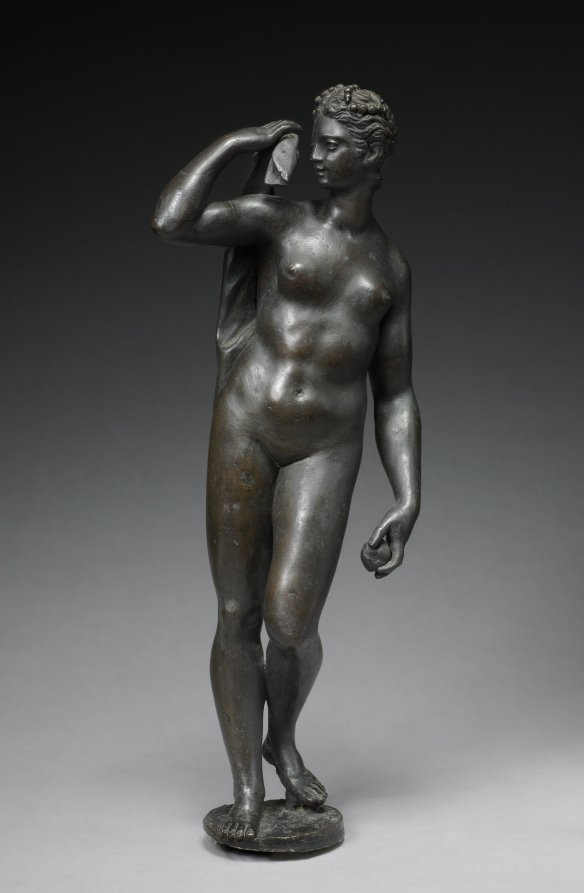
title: Venus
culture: Italy, 16th century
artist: Danese Cattaneo (Italian, 1509–1573)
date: c. 1560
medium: bronze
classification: Sculpture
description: Cattaneo's Venus is reminiscent of the ancient Aphrodite of Knidos by Praxiteles (Greek, c. 375–340 BC), as Venus holds her drapery in her right hand, leaving her body fully exposed. This work recalls Cattaneo's bronze sculptures of goddesses with the unbalanced curvature of the body and elaborately sculpted hair. Along with the hands and feet, the back of the figure is largely unfinished, indicating that it probably originally stood against a wall or in a niche.